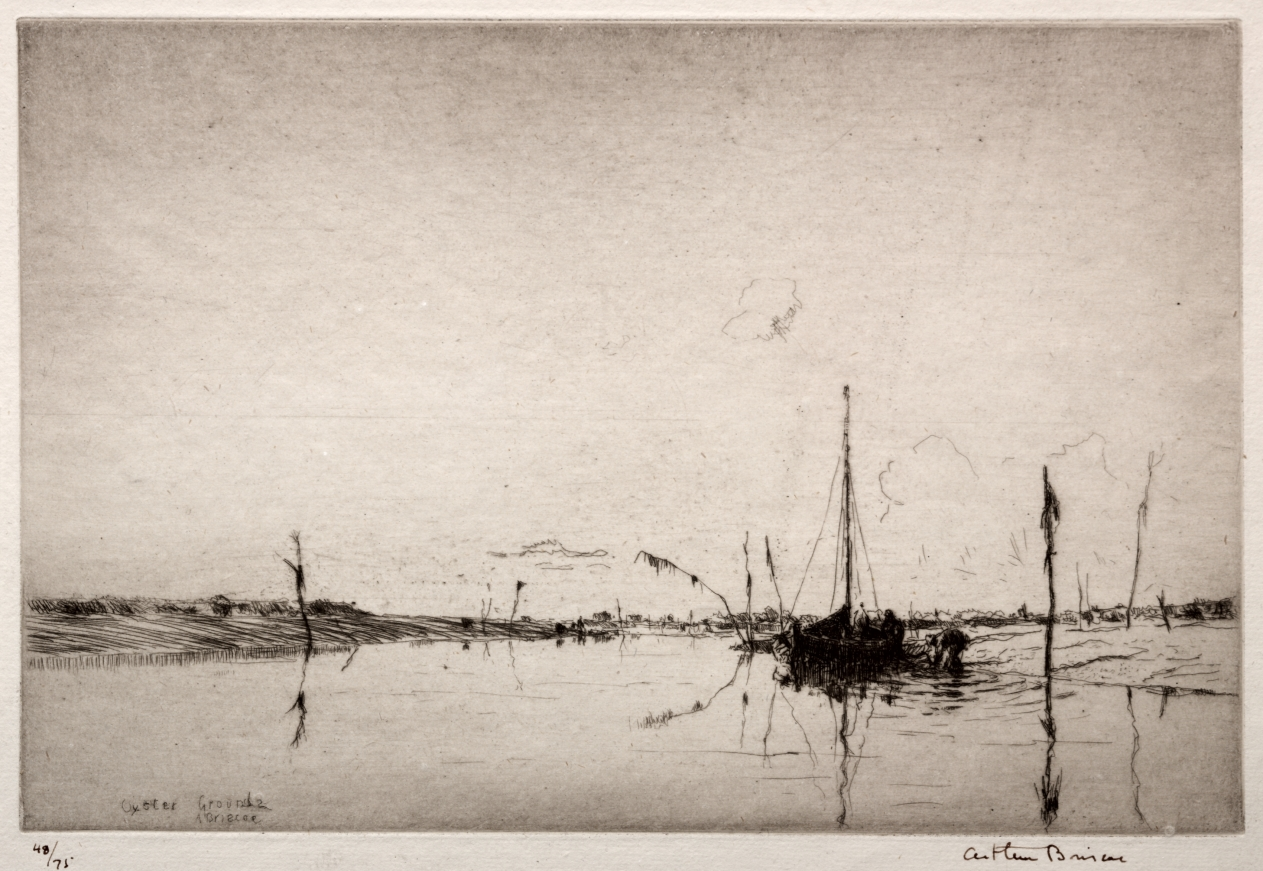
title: Oyster Grounds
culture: England, 20th century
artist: Arthur John Trevor Briscoe (British, 1873–1943)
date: 1925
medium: etching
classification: Print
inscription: Lower margin, in ink: 48/75 Arthur Briscoe